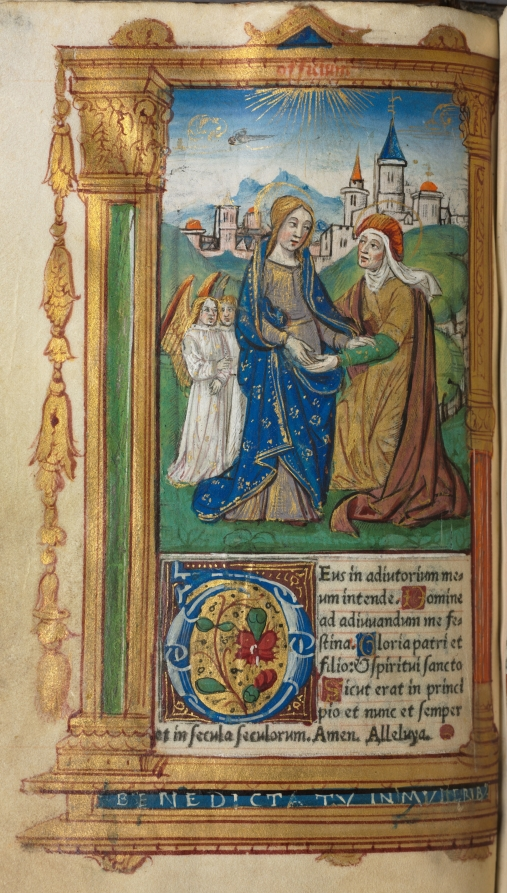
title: Printed Book of Hours (Use of Rome): fol.29v, The Visitation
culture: France, Paris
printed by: Guillaume Le Rouge (French, Paris, active 1493–1517)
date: 1510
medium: 112 Printed folios on parchment, bound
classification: Bound Volume